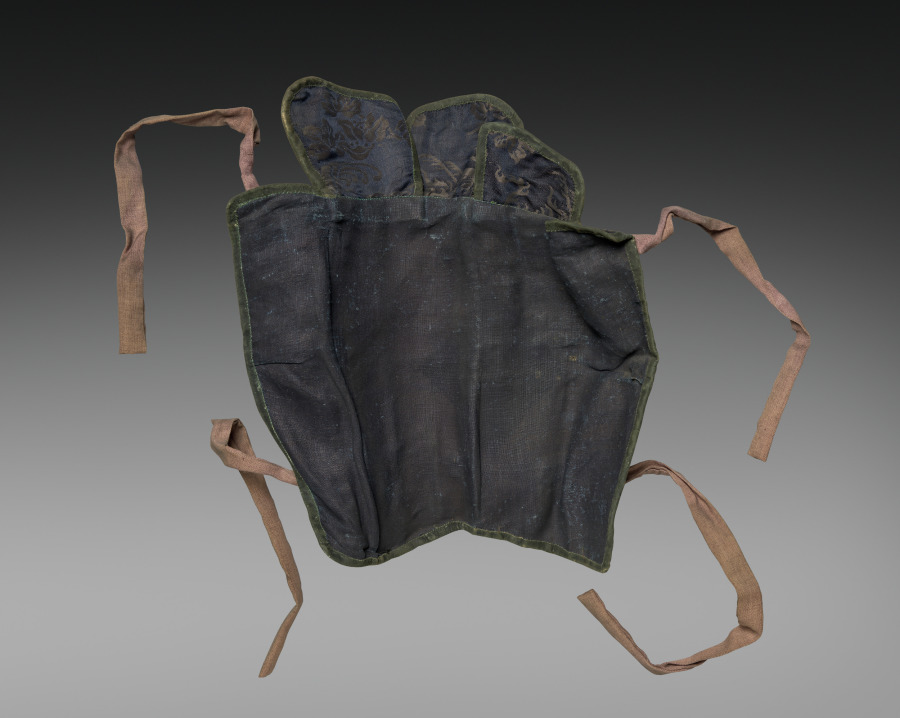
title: Shin Guard (Sune-ate)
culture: Japan, Edo period (1615–1868)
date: 1600s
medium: Iron, lacquer, textile (silk)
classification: Arms and Armor